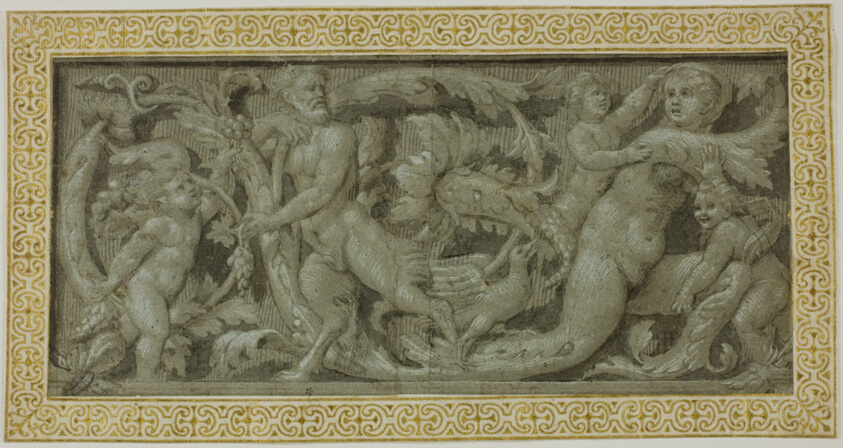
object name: Drawing and Watercolor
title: Frieze with Satyr, Nymph, and Putti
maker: Circle of Giovanni Antonio de'Sacchis, called Il Pordenone; Italian, c. 1483-1539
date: 1503/39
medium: Brush and brown ink and brown wash, heightened with lead white (partially oxidized), on blue laid paper pieced in center, edge mounted to cream laid paper with ornamental border in brush and gold paint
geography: Italy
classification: ink and wash; drawings (visual works); prints and drawing